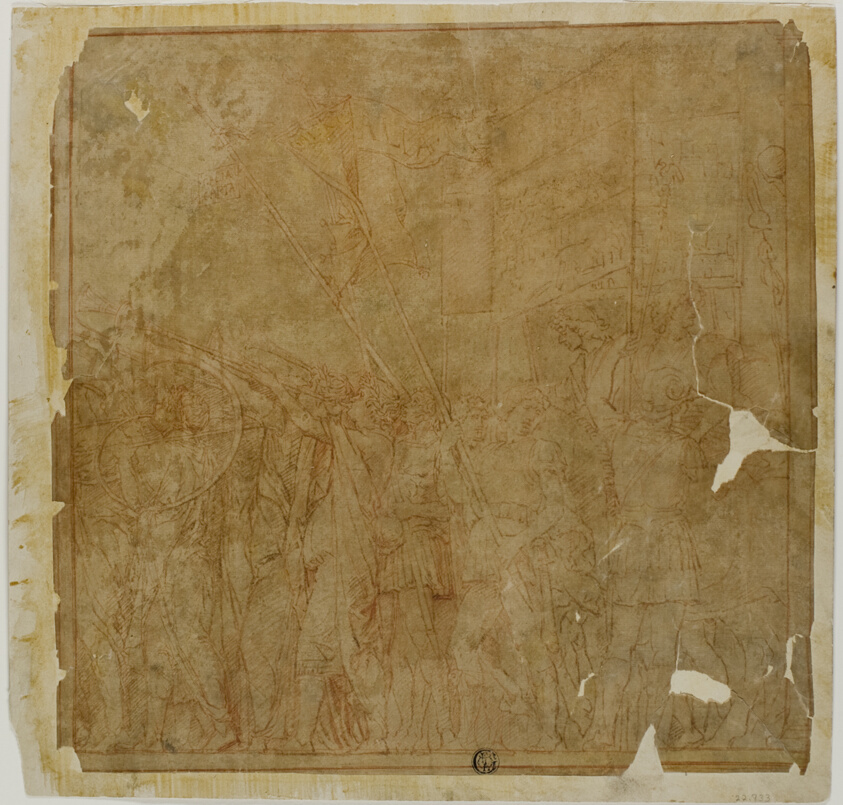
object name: Drawing and Watercolor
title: Study for the Triumphs of Julius Caesar: Canvas No. I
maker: After Andrea Mantegna; Italian, 1431-1506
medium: Pen and brown ink, with red pencil, on tan laid paper, laid down on ivory wove paper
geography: Italy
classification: pen and ink drawings; drawings (visual works); prints and drawing